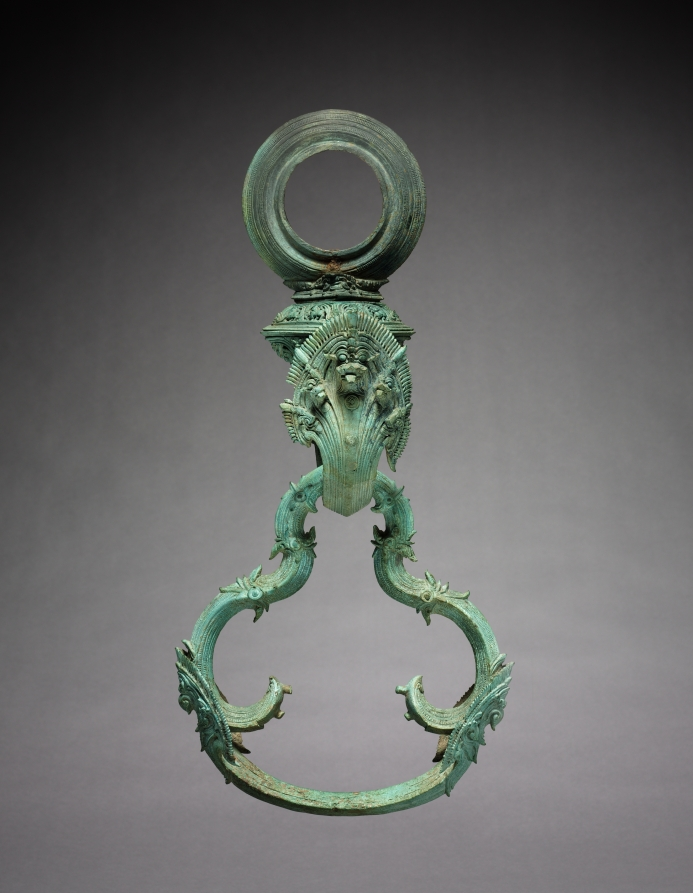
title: One of a Pair of Decorated Palanquin Hooks and Rings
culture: Cambodia, Angkor Wat Style, 12th century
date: 1100–1175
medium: bronze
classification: Sculpture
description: Hooks, suspension rings, and finials cast in bronze are very common fixtures in Cambodian decorative art. Frequently they served a practical function, such as the present set, used for a palanquin in which a person was carried from place to place. The litter or throne was fastened to the rings which in turn were suspended from the books fixed by bolts to transverse poles carried on the shoulders of the palanquin bearers. Chariots, palanquins, furniture, and harnesses were frequently embellished with various bronze decorations, finials, and fixtures. Those, as a rule, were gilded, making the objects they served look very sumptuous. The relief sculpture found on various Khmer monuments, such as Angkor Wat or Bayon, illustrates well the use and context of those bronze implements in ancient Cambodian life. These frequently elaborate bronze fixtures were decorated with motifs generally popular in Cambodian art: such as nagas, garudas, floral, or animal patterns. This pair of hooks and rings, unusually large in size, take on a naga form in the hooks. They are decorated with perforated floral and animal motifs done with great care and precision. The rings, suspended from hooks, are in the form of tri-fold flower stalks with naga motifs repeated at the end of the curved stalks. Such elaborate and huge hooks and rings must have no doubt decorated a palanquin of an important individual, possible a ruler himself. Their decoration is typical of the mature Angkor Wat style.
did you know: The naga, a water serpent with a multiheaded hood, is a Khmer national emblem.